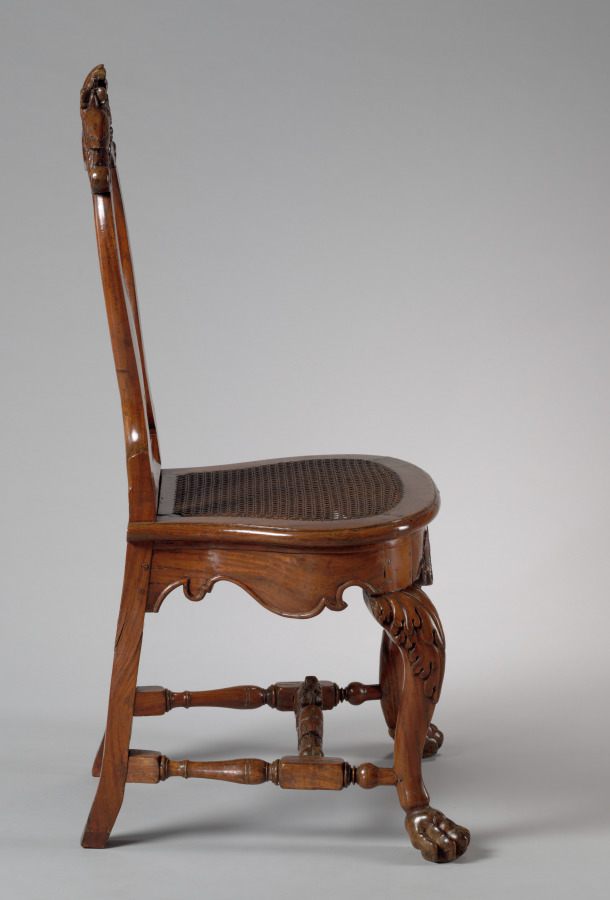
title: Side Chair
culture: Netherlands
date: 1705–15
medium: tulipwood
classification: Furniture and woodwork